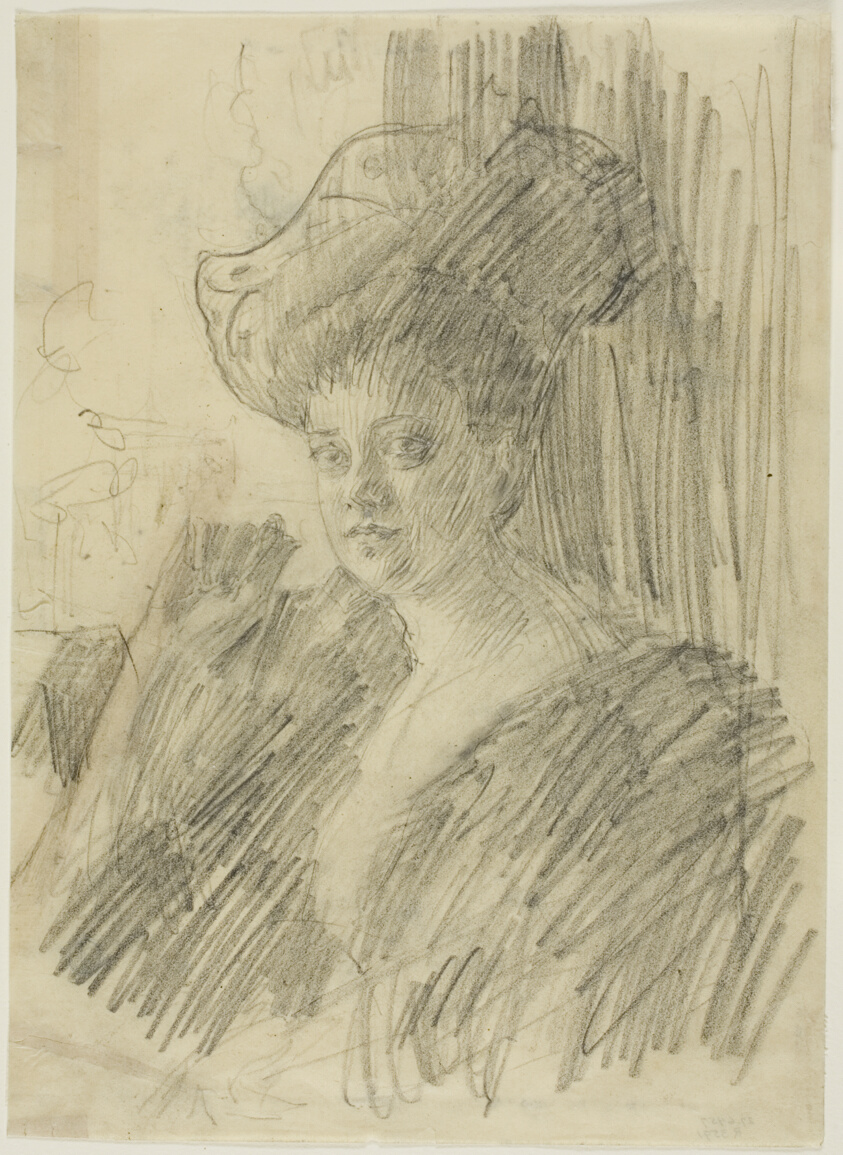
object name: Drawing and Watercolor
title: Betty Nansen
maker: Anders Zorn (Swedish, 1860-1920)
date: c. 1905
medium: Graphite on cream wove tracing paper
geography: Sweden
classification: graphite; drawings (visual works); prints and drawing